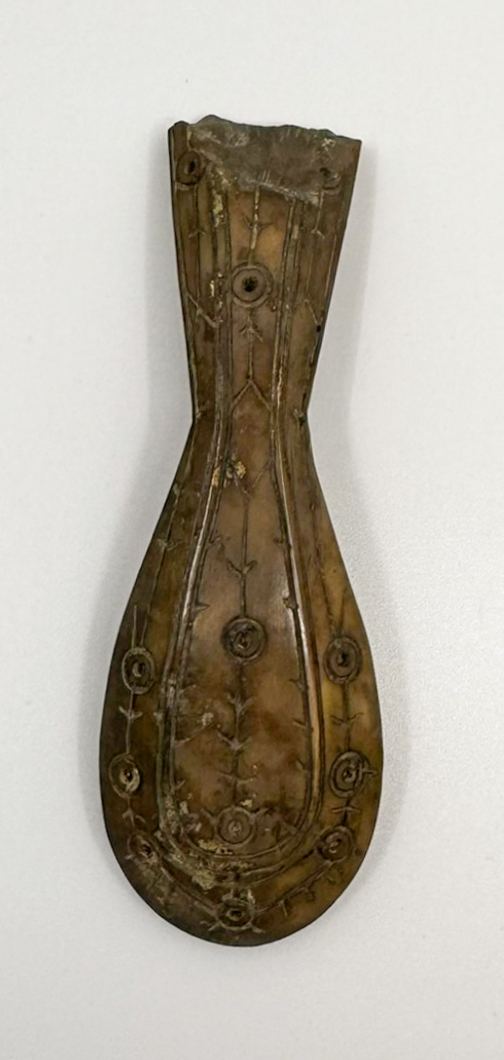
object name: Decorative Arts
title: Probably a Knife or Scraper Handle with Incised Lines and Circles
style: punuk, eskimo, Pre-Columbian, americas, Arts of the Americas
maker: Carver unknown (Punuk); Seklowaghayaget, St. Lawrence Island, Alaska, United States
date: 800–1000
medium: Walrus ivory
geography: Alaska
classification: ivory; american decorative arts; tool; decorative arts; art of the americas